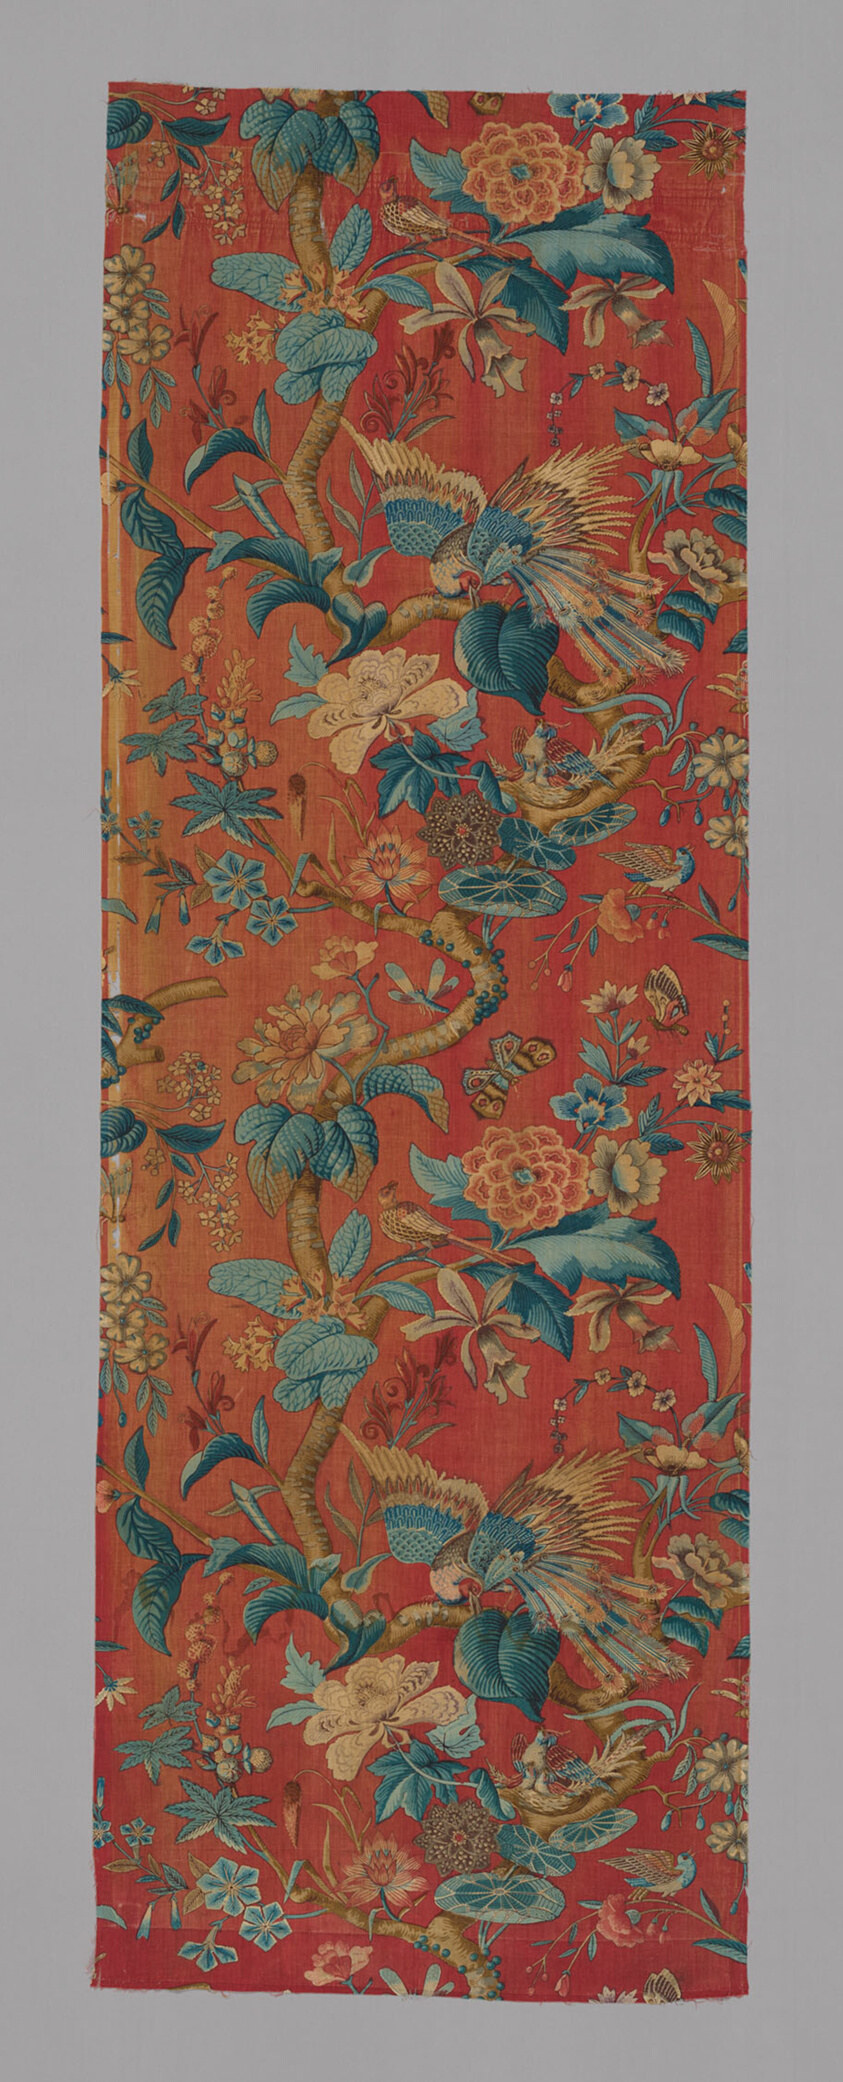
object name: Textile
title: Panel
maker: England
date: 1801/25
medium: Cotton, plain weave; block printed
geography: England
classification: textile; weaving - printed; weaving; printed textile